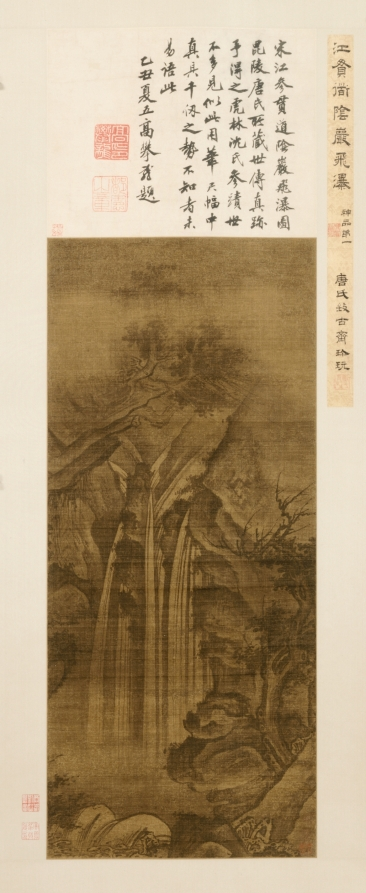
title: Waterfall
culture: China, Song dynasty (960-1279) - Yuan dynasty (1271-1368)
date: 1271–1368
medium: hanging scroll, ink and slight color on silk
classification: Painting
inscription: Label on the mounting with 2 seals of T'ang ? of Pi-ling (16th c.); label on back of mounting of Kü Kuang-hsü (1731-1797). 1 colophon and 8 additional seals: 1 colophon, dated 1625, and 2 seals of Kao P'an-lung (1562-1626); 2 seals of Liu Shu (1759-1816); 1 seal of Pi Lung (late 18th c.); 1 seal of Ts'ao tzu-wen; 2 seals unidentified. WKH